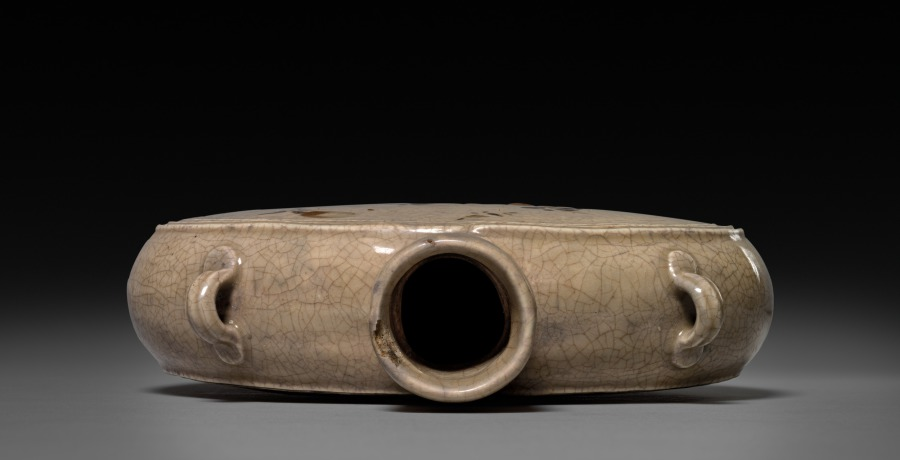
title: Pilgrim Bottle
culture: China, Ming dynasty (1368–1644)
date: 1368–1644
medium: porcelain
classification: Ceramic